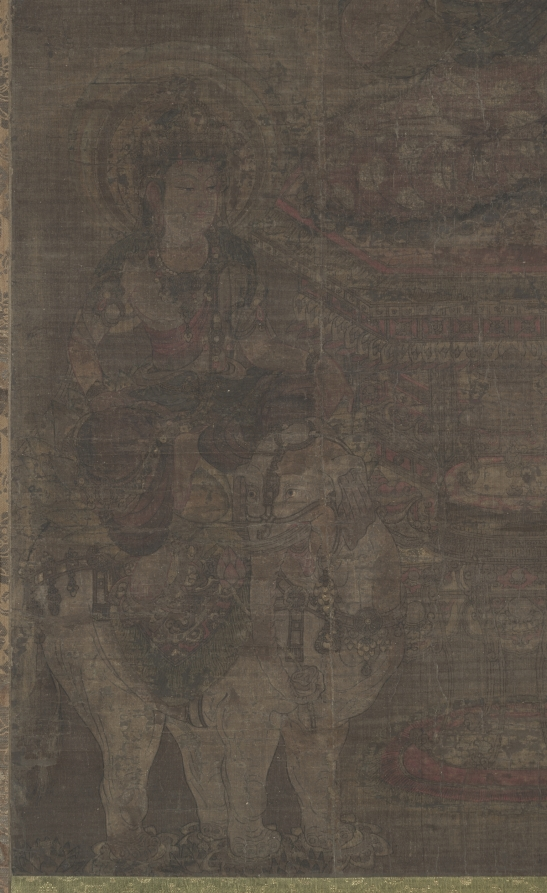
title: Shakyamuni Triad: Buddha Attended by Manjushri and Samantabhadra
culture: China, Tang dynasty (618-907)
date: c. 900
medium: Hanging scroll; ink and color on silk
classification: Painting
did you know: Samantabhadra rides a six-tusked white elephant, while Manjusri is seated upon a lion.